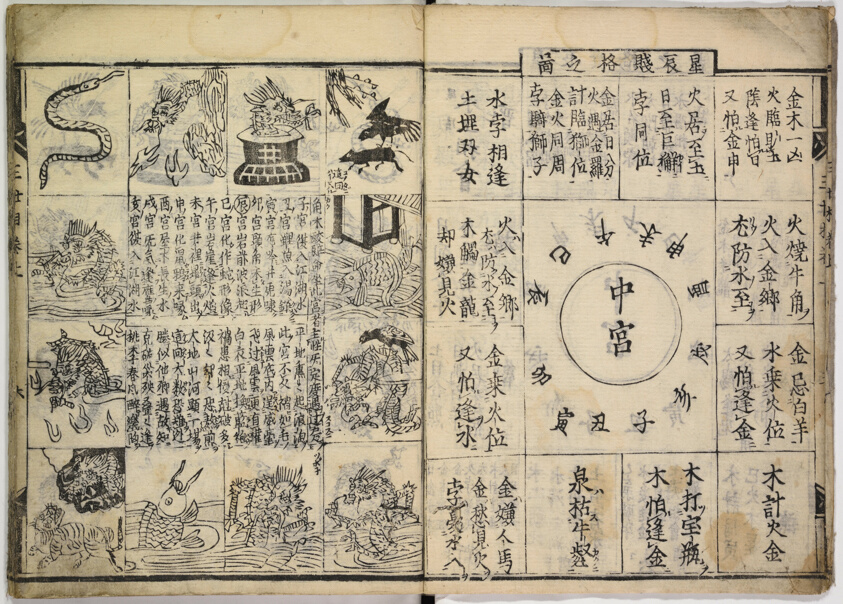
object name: Book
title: The Aspects of the Three Worlds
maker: Artist unknown, Japanese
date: 1635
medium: Woodblock-printed book; 2 vols.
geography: Japan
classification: book